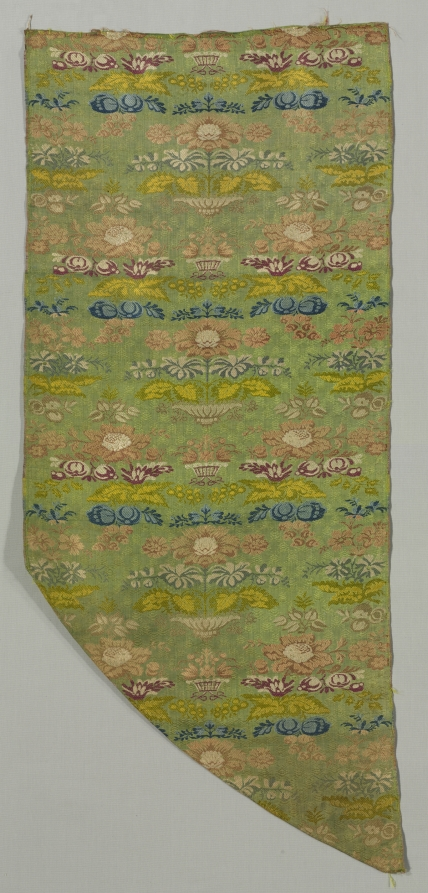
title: Length of Silk Textile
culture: Italy, 18th century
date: 1700s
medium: damask, brocaded; silk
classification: Textile